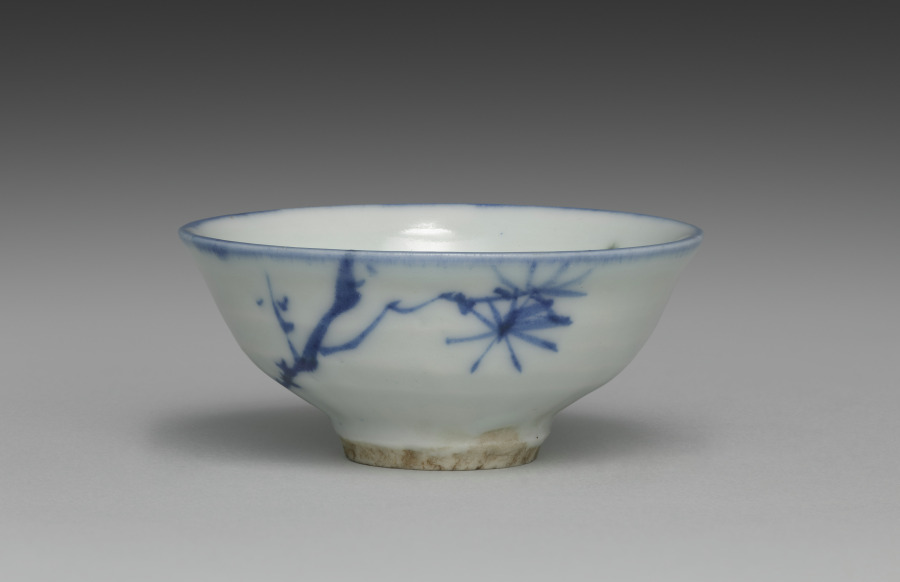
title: Sake Cup with Auspicious Plants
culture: Japan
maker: Seifū Yohei II (Japanese, 1844–1878)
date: 1861–78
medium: One of a pair of sake cups; porcelain with underglaze blue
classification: Ceramic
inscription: 松梅芝仙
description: Seifū Yohei II excelled as a painter, as evidenced by his floral and landscape designs. His works were selected as the best among Kyoto ceramics shown to jurists from Europe and the US, thus paving the way for international recognition of the studio in the late 1800s.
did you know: The plum and the pine are two of the "Three Friends of Winter," auspicious symbols of a cultured scholar's virtues: steadfastness, resilience, and flexibility.